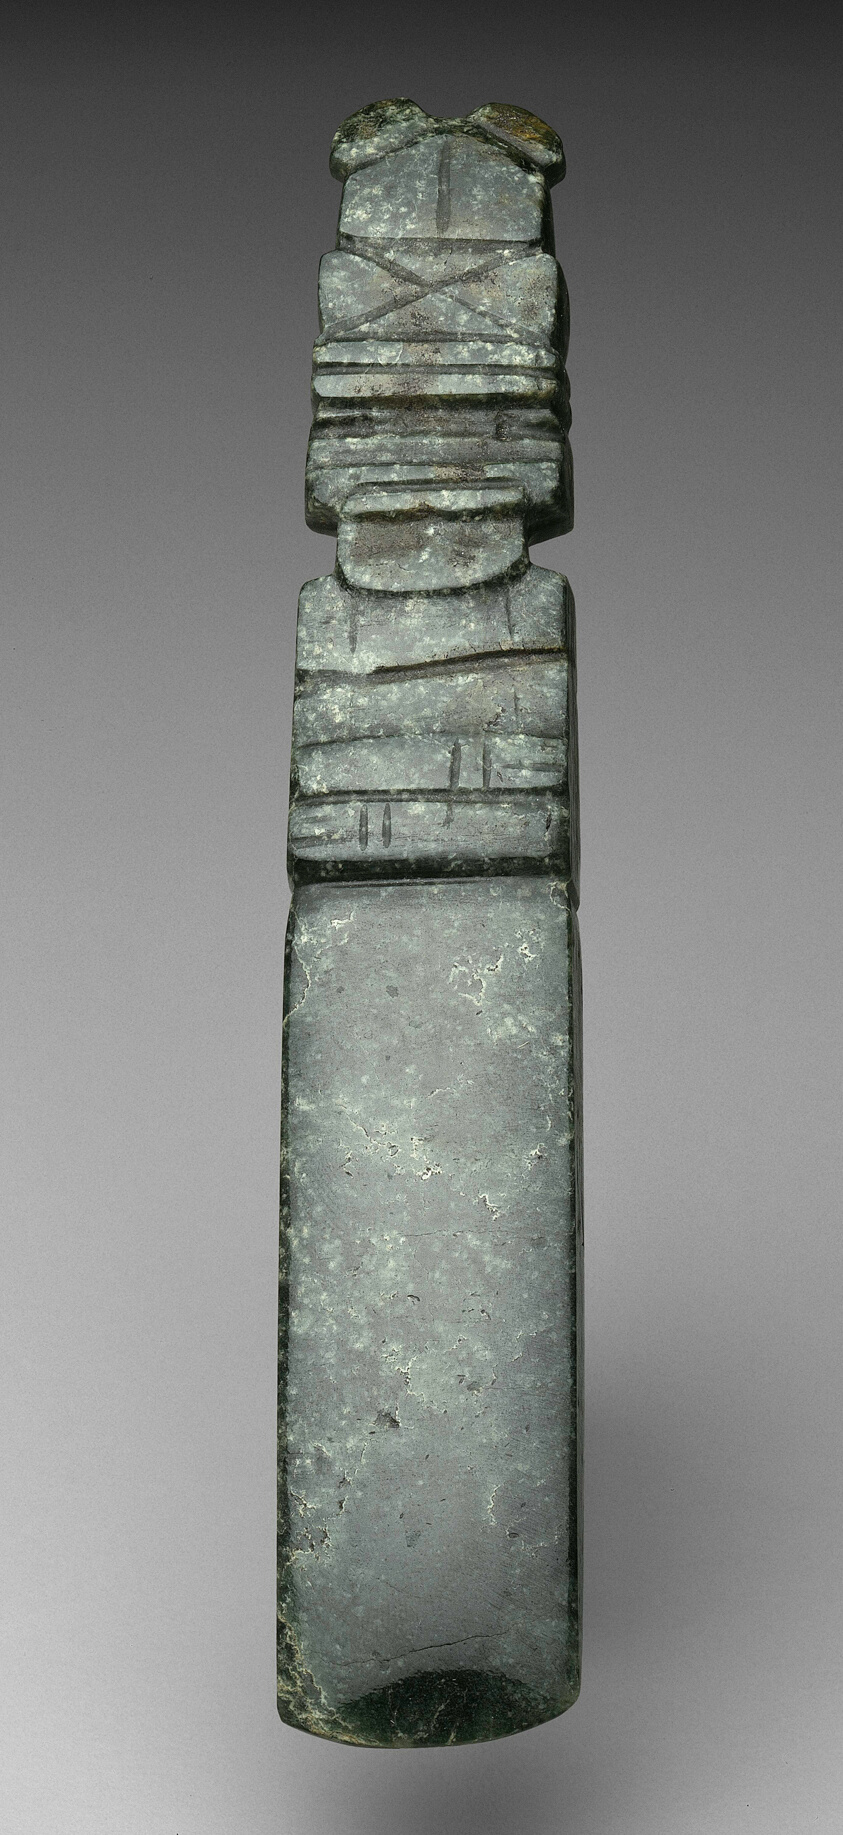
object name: Costume and Accessories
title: Celt Pendant Depicting an Abstract Figure with a Tall Headdress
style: nicoya, americas, lower central america, Arts of the Americas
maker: Nicoya (Nicoya, Guanacaste province, Costa Rica)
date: 1–500 CE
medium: Jade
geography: Nicoya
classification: pendant (jewelry); stone; art of the americas; jewelry; costume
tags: abstract figures, agriculture